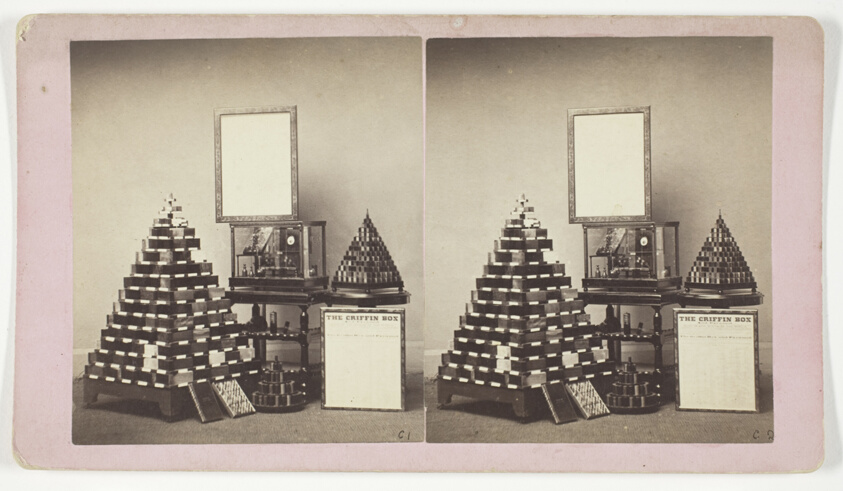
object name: Photograph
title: Untitled (The Griffin Box)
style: 19th century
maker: Artist unknown; American, late 19h century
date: 1875/99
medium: Albumen print, stereo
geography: United States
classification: photography; photograph